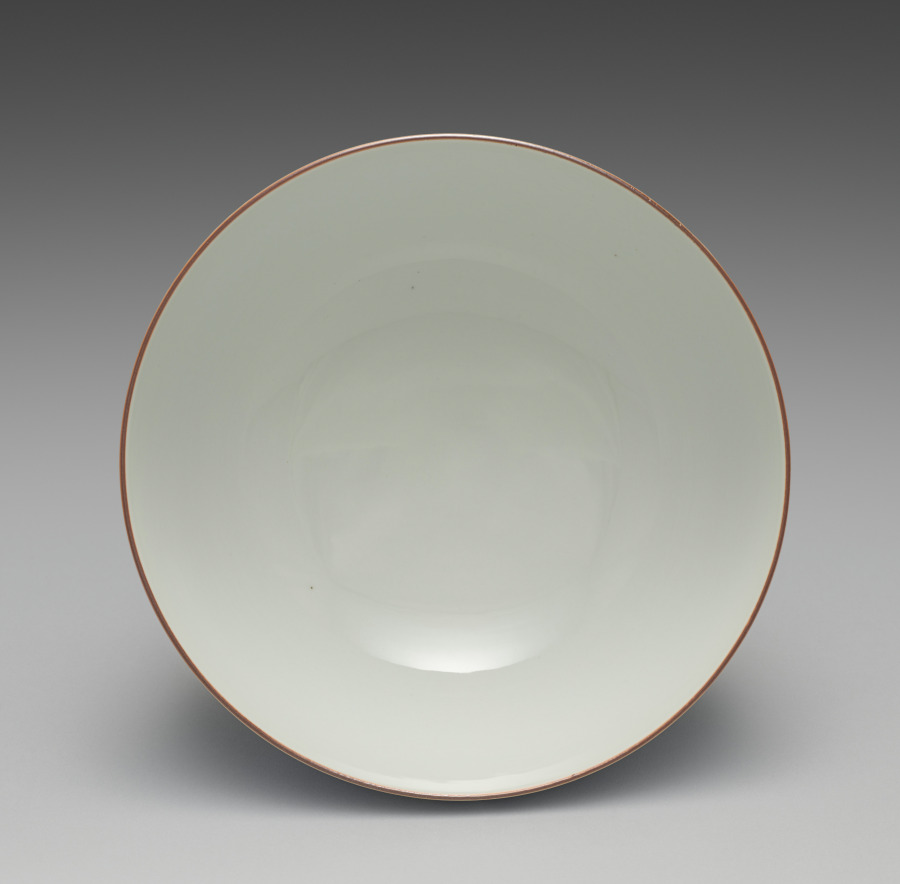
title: Sweets Bowl with Egrets and Willow in Snow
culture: Japan, Meiji period (1868–1912)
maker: Seifū Yohei III (Japanese, 1851–1914)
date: 1912–14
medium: Porcelain with underglaze blue and iron oxide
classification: Ceramic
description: For this sweets bowl, Yohei III designed a dramatic surround of egrets in a willow tree under heavy snow. The entire design is painted in cobalt blue under the transparent glaze. If one turns the bowl clockwise, two egrets come into view, one after the other. As they ascend, both struggle against the wind amid snow-laden weeping willow branches. They are followed by a stretch of willow branches that evoke the bitter cold. The sky is painted with blue washes all around the designs. The imagery culminates in a group of three egrets huddled together in the crotch of the tree. Of course, it is also possible to read the scene in the other direction, in which case the sheltering egrets look toward one of the flying egrets, who looks back at them, and it is the egret with wings outspread, looking directly down, who concludes the scene. Two thin bands of blue set off the design just under the bowl’s rim, and a band of brown iron oxide runs along the rim. Another two bands of blue run around the middle of the foot. The inside of the bowl’s box lid has an attestation by Yohei IV that it is the work of Yohei III.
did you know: This sweets bowl requires someone to rotate it to experience the birds observing one another.